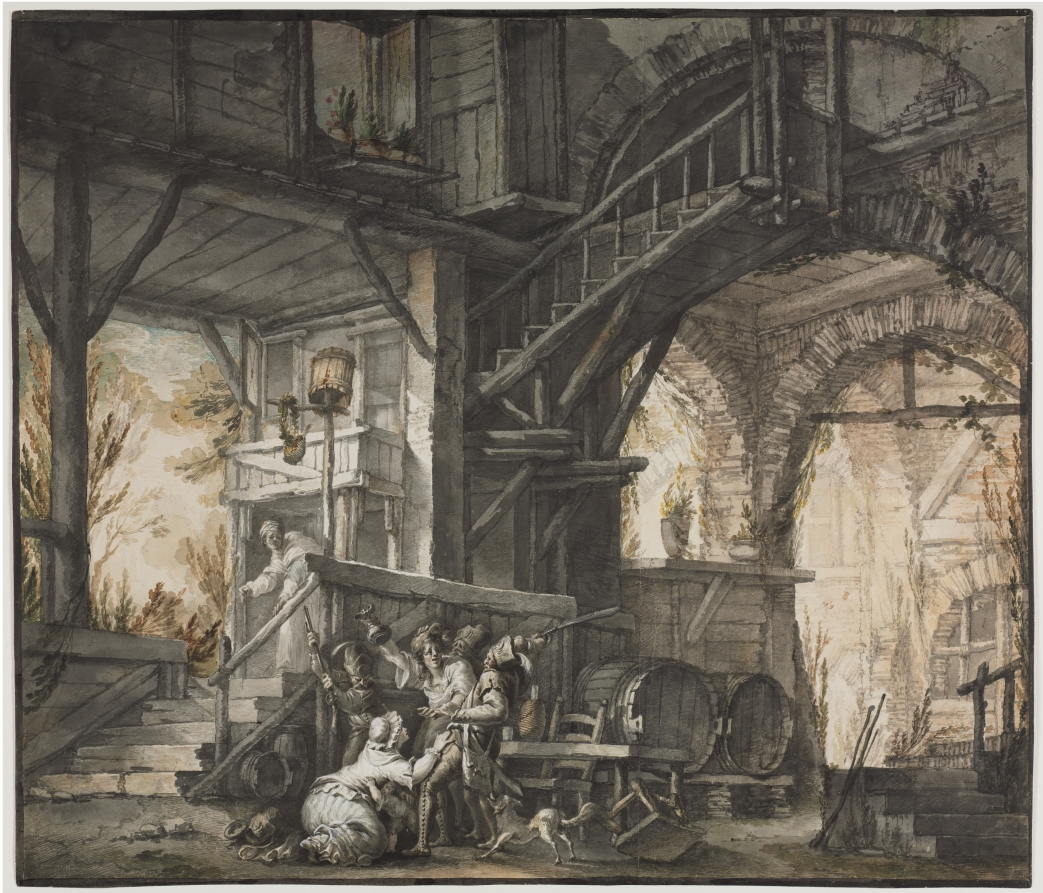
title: Theater Scene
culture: Italy, 18th century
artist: Giovanni David (Italian, 1743–1790)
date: c. 1775–76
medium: watercolor and extensive point of brush work with graphite and white gouache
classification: Drawing